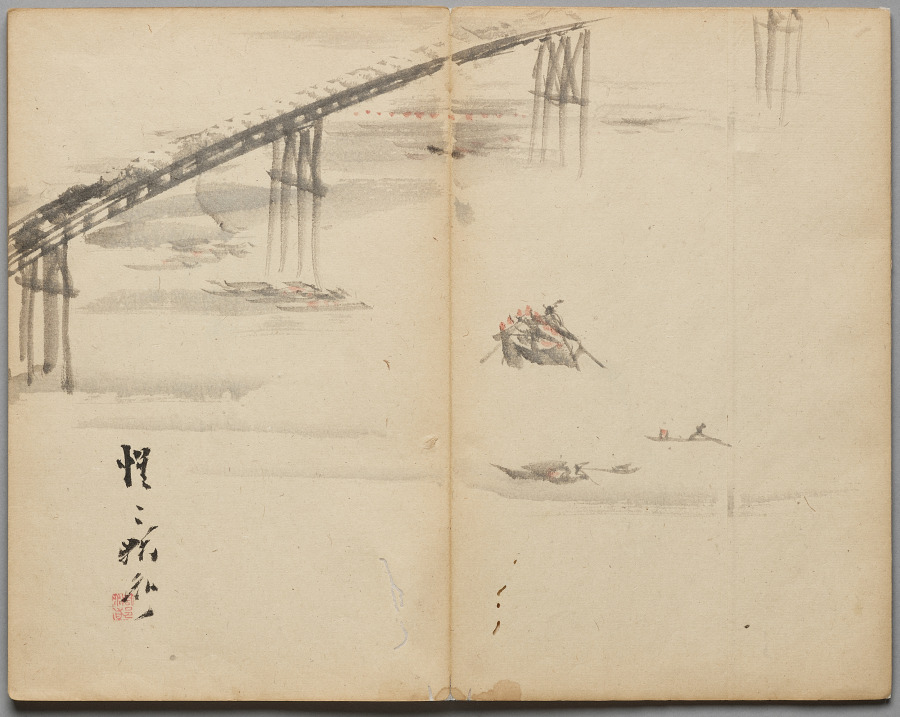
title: Boats on a River from Sketch Album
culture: Japan, Edo period (1615–1868) to Meiji period (1868–1912)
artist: Kawanabe Kyōsai (Japanese, 1831–1889)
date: mid- to late 1800s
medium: Accordion-style book of 26 double-leaves; ink and color on paper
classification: Bound Volume